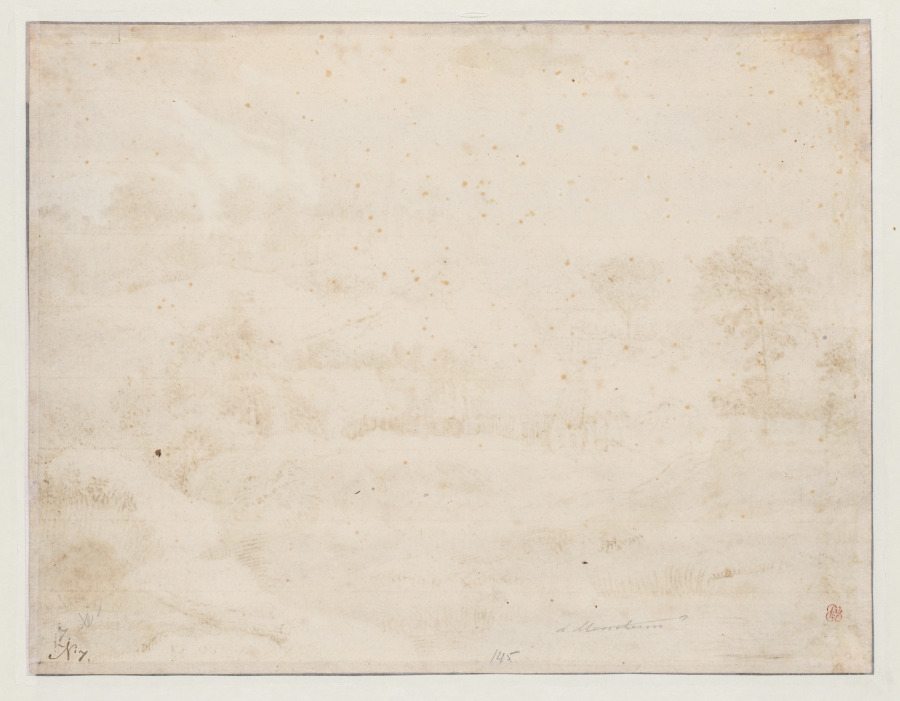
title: View near Orleans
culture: Netherlands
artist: Isaac de Moucheron (Dutch, 1667–1744)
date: c. 1695–97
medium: Pen and brown ink, grey, brown, pink-brown, and pale grey mixed with white washes, with traces of graphite underdrawing on laid paper; framing lines in pen and brown ink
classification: Drawing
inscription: Upper center, in brown ink: Buyten Orleans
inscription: verso, in brown ink, lower left: N. 7. (numeral of Johan Goll van Franckenstein senior (Lugt. 2987)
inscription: verso, in graphite: 7. and d Moucheron? (crossed out) and 145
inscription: Collector’s stamp verso, “PG”? in red ink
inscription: watermark: fleur de lys (Hinterding B-a_NGV-23-4)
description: The Dutch artist Isaac de Moucheron’s view of a rural hillside is inscribed in Dutch “Buyten Orleans” (outside Orleans), indicating that he made the drawing while passing through France on a journey from the Netherlands to Italy. De Moucheron likely captured this scene with graphite and ink while on-site and then finished it later with gray, brown, and pink washes. Many Dutch artists took Italian sojourns to sketch the landscape, antique sculpture, and architecture.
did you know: The artist captured this scene in France during a long journey from the Netherlands to Italy.